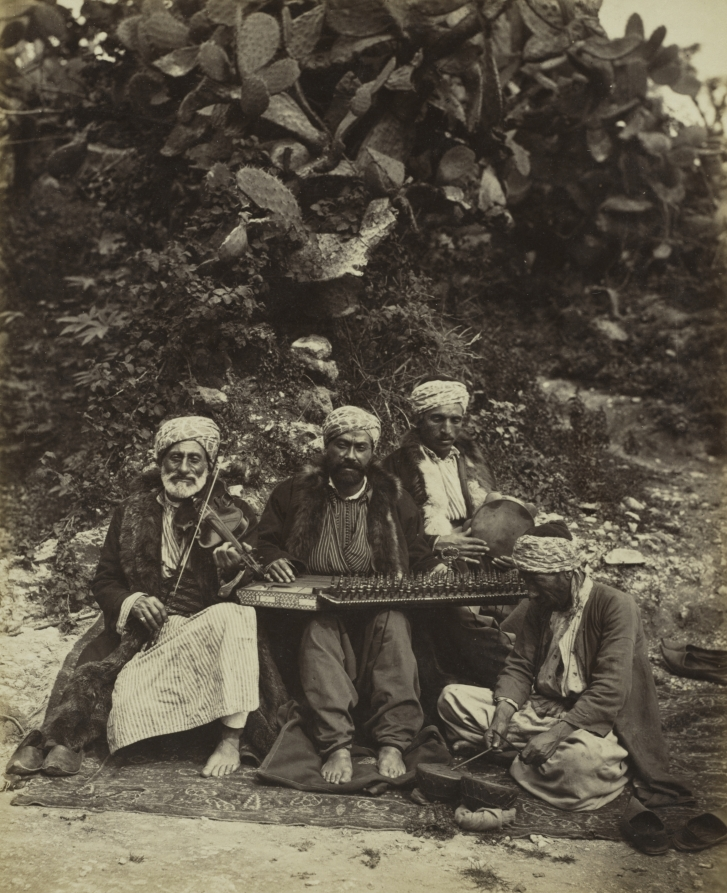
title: Arab Musicians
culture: England, 19th century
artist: Ludovico Wolfgang Hart (British)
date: 1864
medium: albumen print from wet collodion negative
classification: Photograph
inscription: none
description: Taken to catalogue and document cultural practices, both of these photographs were intended as portraits of professions or ethnographic types rather than portraits of individuals. Hart’s image was part of his subscription series Universal Gallery of Peoples, which sought “to reproduce through photography the national costumes that are disappearing rapidly before the advance of civilization, to preserve for people the flavor, and for artists the memory of what once was beautiful and picturesque.” An unidentified photographer captured the picturesque pifferari, country musicians who wandered European cities around Christmas playing before images of the Virgin and on the streets. They were a common theme for French and Italian painters and photographers in the 1840s and 1850s.